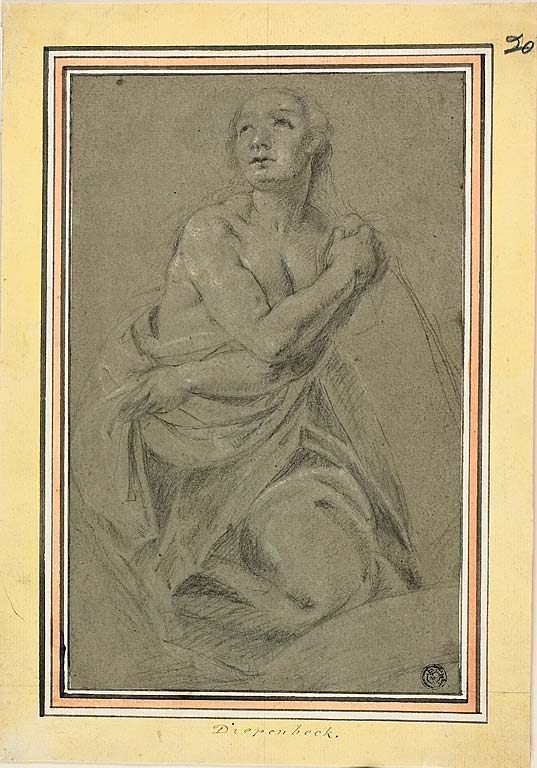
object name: Drawing and Watercolor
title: Draped Kneeling Female Nude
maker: Abraham Jansz. van Diepenbeeck; Flemish, 1596-1675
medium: Black chalk heightened with white chalk on gray laid paper, laid down on card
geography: Flanders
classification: chalk; drawings (visual works); prints and drawing